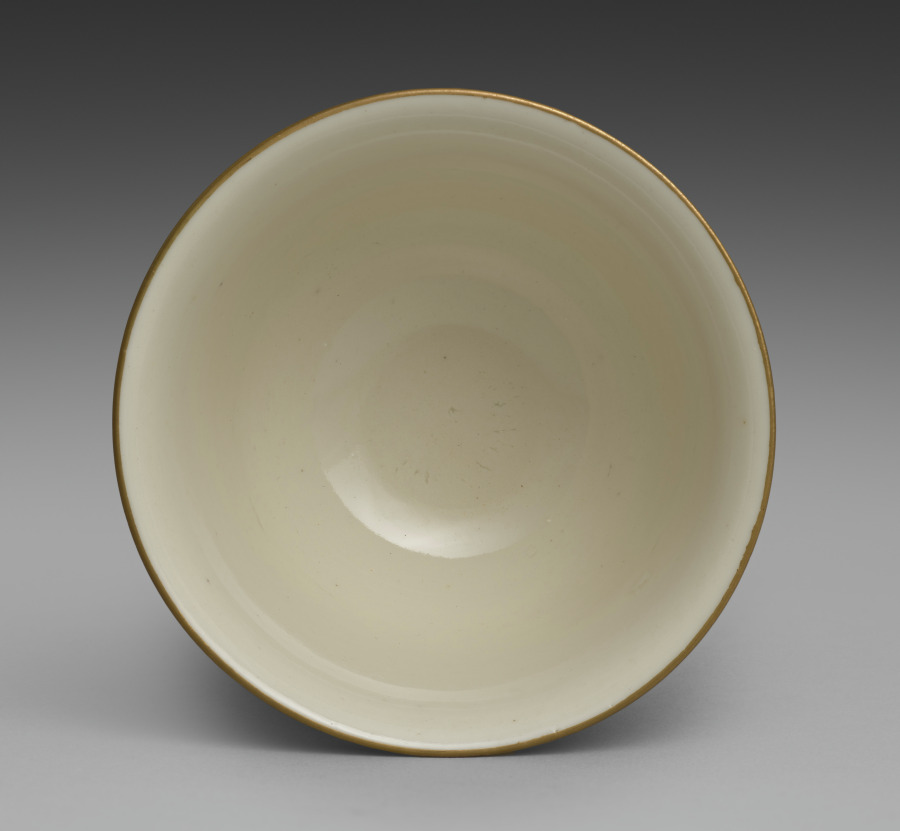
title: Drinking Cup from Dining Set with Plum Blossoms and Cracked-Ice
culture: Japan, Meiji period (1868–1912)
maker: Seifū Yohei II (Japanese, 1844–1878)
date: c. 1875–78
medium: Porcelain with molded designs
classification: Ceramic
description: Each item in this set has a delicate low-relief design of flowering plum branches over scattered, intersecting lines meant to resemble the cracked-ice surface of a frozen body of water and is signed on the base in gold pigment. While Yohei II produced many fine works in underglaze blue, like those produced by Kiyomizu Shichibei, he also made works in quite different styles later in his career, from the early 1870 s. In 1873, he was appointed purveyor to the Industrial Center of Kyoto Prefecture, a designation associated with Kyoto’s efforts to reach an international market through the port of Kobe; and from 1875 until his death, he was involved in national-level projects to present Japanese ceramics across the world. It was during this period that Yohei III was apprenticed to Yohei II, and it has been suggested that this set may in fact be an early example of Yohei III’s work, which he signed with his teacher’s name. Decorated with flowers resembling Japanese textile motifs, the set calls to mind the design of Yohei II’s pair of vases with plum blossoms in the Victoria and Albert Museum. Here, the elaborate trees created for a formal public exhibition setting have been translated into the approachable blossoms of the genteel domestic environment. While the designs are consistent across the pieces, each raised flower petal and pistil and each incised line in the ice was done by hand, so the cups, bowls, and dishes are similar yet unique. The bottoms of two boxes once identified the set’s owner, but the information has been deliberately obscured with black ink. However, inscriptions still visible appear to indicate two occasions, once at the end of July 1886 , and once again in June 1916 , when parts of the set were requested from Hokura in Niigata Prefecture. The location corresponds to a neighborhood in the present-day city of Jōetsu. The surname Tsuji 辻 also appears on a paper tag affixed to one of the box cloths. Future research may possibly reveal more about their provenance. A vase by Yohei III in a private collection combines the formal grandeur of the Yohei II vases in the Victoria and Albert Museum with the gentler design of this dining set, placing flowering plum trees against soft, scalloped-edge clouds resembling those in golden screens.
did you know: The dining wares have a creamy white coloration that the four boxes containing them identify as Korean in style.